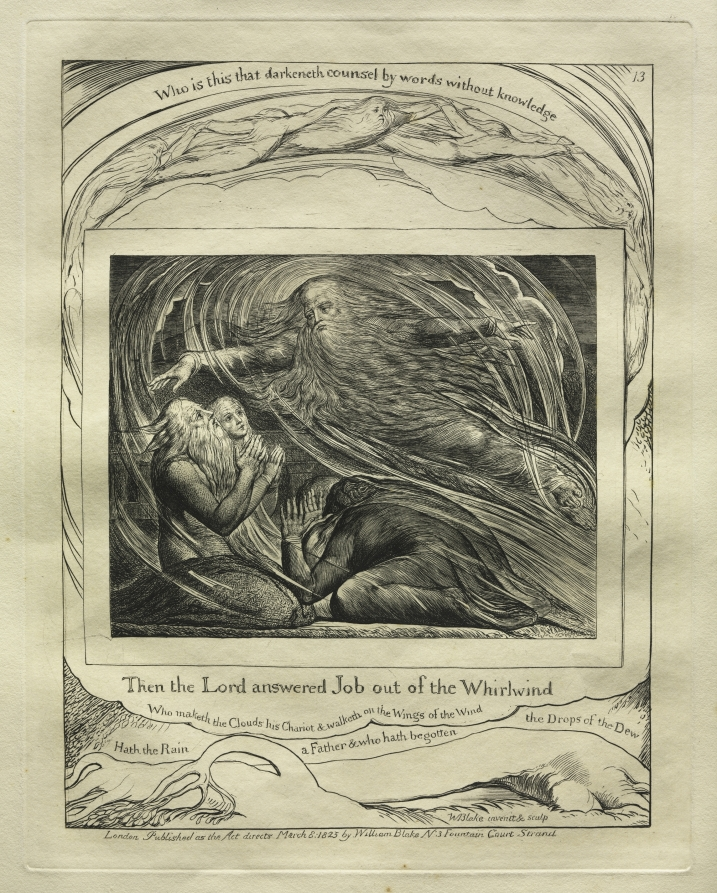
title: The Book of Job: Pl. 13, Then the Lord answered Job out of the Whirlwind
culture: England, 19th century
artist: William Blake (British, 1757–1827)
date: 1825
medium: engraving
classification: Print